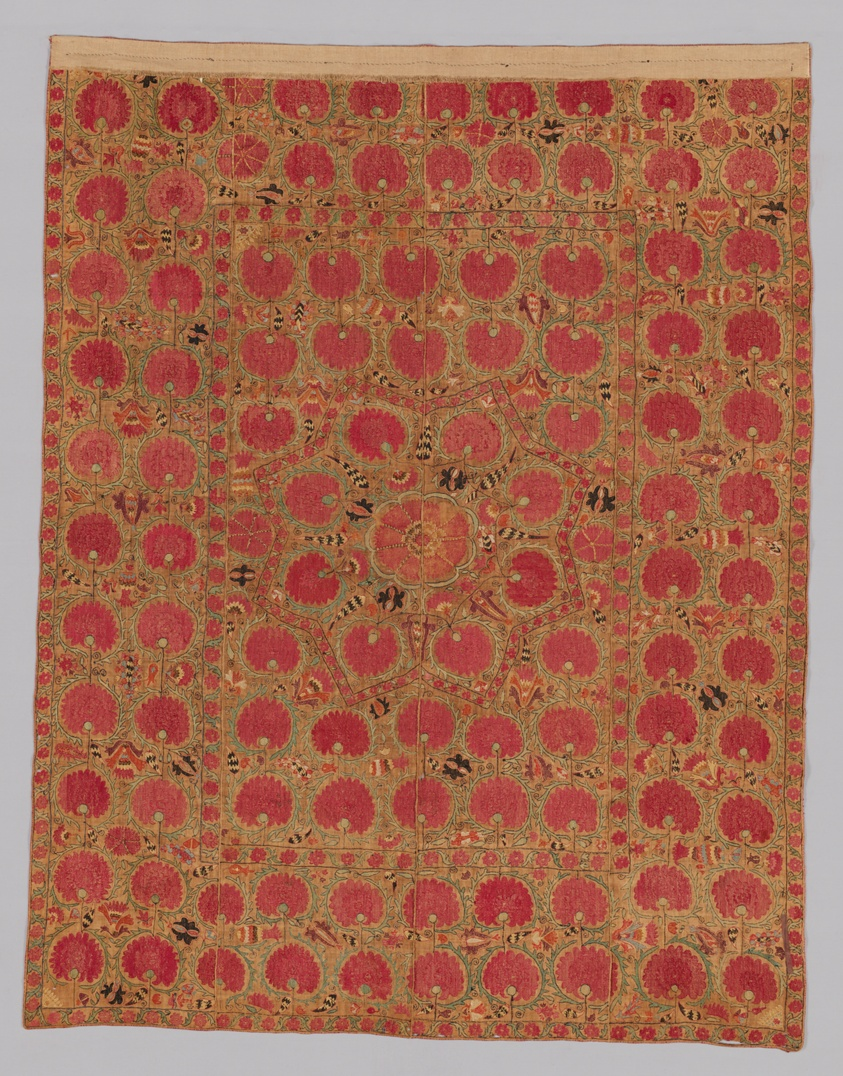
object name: Textile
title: Suzani (large hanging or cover)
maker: Uzbekistan, probably Tashkent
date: 1840/1890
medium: Cotton, plain weave, embroidered with silk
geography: Uzbekistan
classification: embroidery; textile; needlework (visual works)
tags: flowers